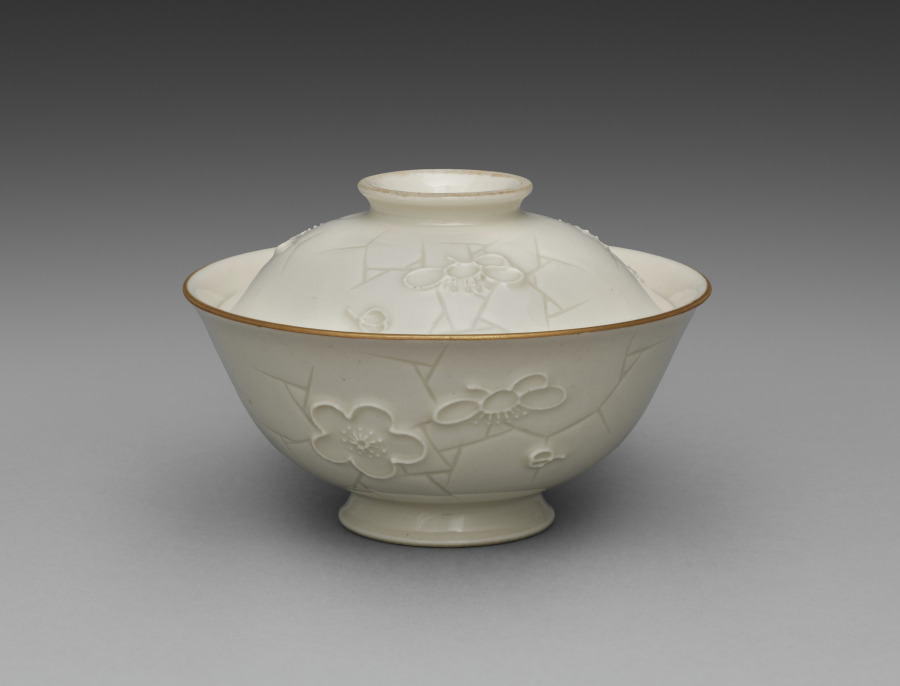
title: Covered Bowl from Dining Set with Plum Blossoms and Cracked-Ice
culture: Japan, Meiji period (1868–1912)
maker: Seifū Yohei II (Japanese, 1844–1878)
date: c. 1875–78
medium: Porcelain with molded designs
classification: Ceramic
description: Each item in this set has a delicate low-relief design of flowering plum branches over scattered, intersecting lines meant to resemble the cracked-ice surface of a frozen body of water and is signed on the base in gold pigment. While Yohei II produced many fine works in underglaze blue, like those produced by Kiyomizu Shichibei, he also made works in quite different styles later in his career, from the early 1870 s. In 1873, he was appointed purveyor to the Industrial Center of Kyoto Prefecture, a designation associated with Kyoto’s efforts to reach an international market through the port of Kobe; and from 1875 until his death, he was involved in national-level projects to present Japanese ceramics across the world. It was during this period that Yohei III was apprenticed to Yohei II, and it has been suggested that this set may in fact be an early example of Yohei III’s work, which he signed with his teacher’s name. Decorated with flowers resembling Japanese textile motifs, the set calls to mind the design of Yohei II’s pair of vases with plum blossoms in the Victoria and Albert Museum. Here, the elaborate trees created for a formal public exhibition setting have been translated into the approachable blossoms of the genteel domestic environment. While the designs are consistent across the pieces, each raised flower petal and pistil and each incised line in the ice was done by hand, so the cups, bowls, and dishes are similar yet unique. The bottoms of two boxes once identified the set’s owner, but the information has been deliberately obscured with black ink. However, inscriptions still visible appear to indicate two occasions, once at the end of July 1886 , and once again in June 1916 , when parts of the set were requested from Hokura in Niigata Prefecture. The location corresponds to a neighborhood in the present-day city of Jōetsu. The surname Tsuji 辻 also appears on a paper tag affixed to one of the box cloths. Future research may possibly reveal more about their provenance. A vase by Yohei III in a private collection combines the formal grandeur of the Yohei II vases in the Victoria and Albert Museum with the gentler design of this dining set, placing flowering plum trees against soft, scalloped-edge clouds resembling those in golden screens.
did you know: The dining wares have a creamy white coloration that the four boxes containing them identify as Korean in style.